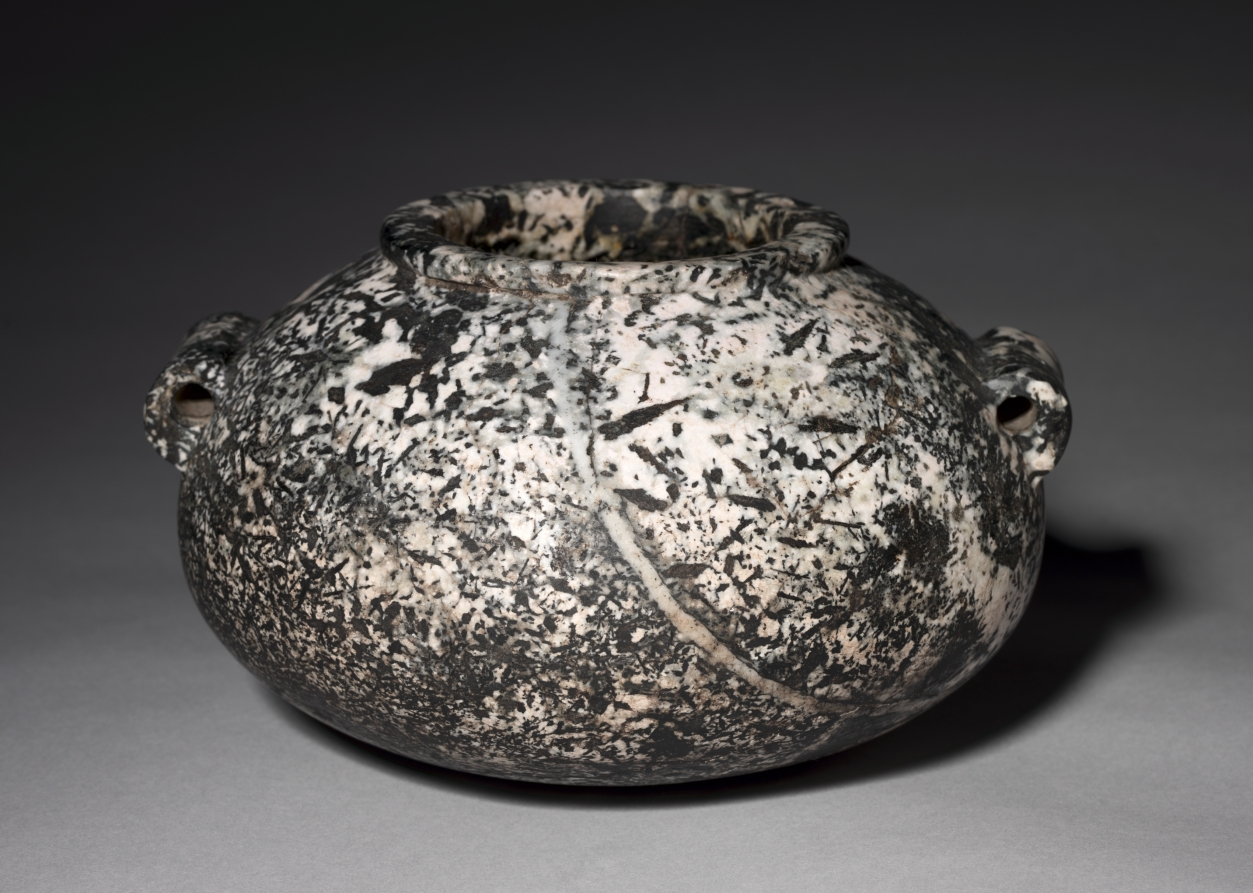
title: Squat Jar with Lug Handles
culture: Egypt, Early Dynastic (2950–2647 BCE), Dynasties 1–3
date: 2950–2573 BCE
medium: pegmatitic hornblende diorite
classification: Vessels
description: A single tomb might contain hundreds of stone vessels replicating the shapes of pottery vessels used in everyday life. The most popular material for stone vessels was white or banded travertine (Egyptian alabaster), found close to the Nile, but prospectors and quarrymen often traveled far in search of the desired materials. The hard stone hornblende diorite, notable for its mottled texture, was quarried in the desert along the route to the Red Sea.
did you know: The stone used for this vessel, a pegmatitic hornblende diorite whose white crystals contain a faint tint of pink, indicates it must have been considered a luxury item.